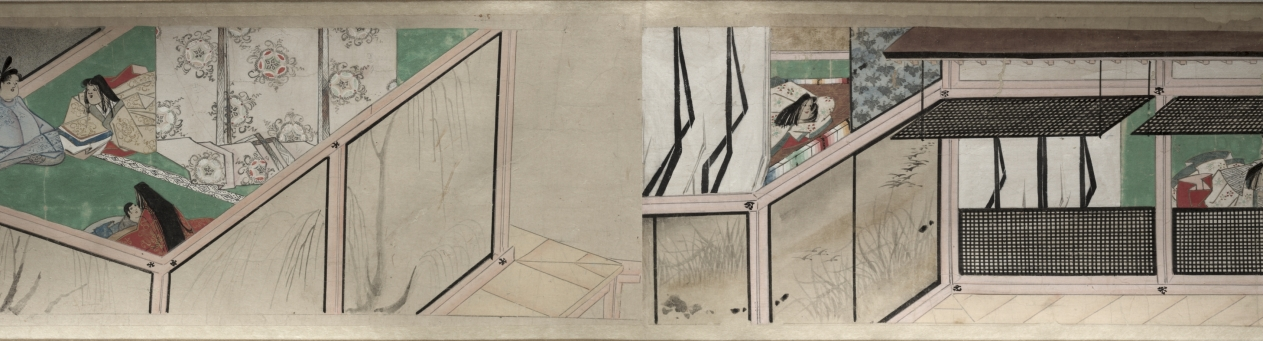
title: The Saltmaker's Story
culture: Japan, Edo period (1615–1868)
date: early 1600s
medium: One of a pair of handscrolls; ink, color, and gold on paper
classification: Painting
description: Once read and copied by girls at New Year’s celebrations and included in dowries, The Saltmaker’s Story is a rags-to-riches tale in which daughters are gifts from the gods. Despite his simple outlook, the main character progresses from humble roots as an associate at Kashima Shrine to the elite status of grandfather of the emperor through the intervention of the Kashima deity. The Saltmaker’s Story is traditionally presented in a set of three scrolls, but the text of this set has been removed by a previous owner, who remounted the illustrations as a pair. The paintings of this one take us from right to left through the second half of the tale.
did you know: This handscroll originally had texts before its paintings, but the texts were removed.